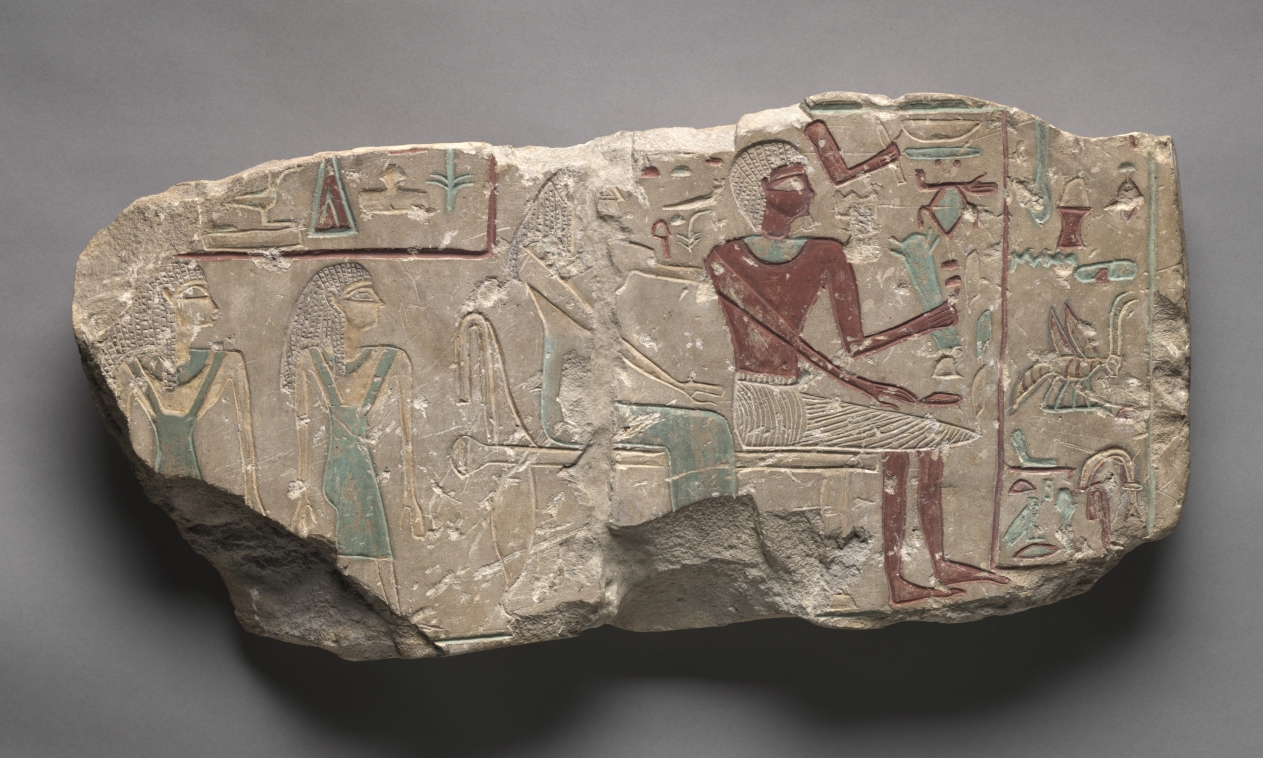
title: Stele of Itetioqer and Family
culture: Egypt, Southern Upper Egypt, Middle Kingdom (2040–1648 BCE), Dynasty 11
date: c. 2123–2040 BCE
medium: painted limestone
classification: Sculpture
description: The huge eyes, spindly limbs, and awkwardly laid out inscriptions are typical of the period after the collapse of the Old Kingdom, when there was no central government. Court sponsorship of the arts declined drastically during this time, and art in the provinces followed its own course. A certain folksy charm--naive and utterly unpretentious--compensates for the lack of sophistication. The two women standing behind the seated man and his wife are probably their daughters. The man’s skin is painted red, the women’s yellow, as was the tradition in Egypt. The inscription is a standard formula for funerary offerings on behalf of Itetioqer.